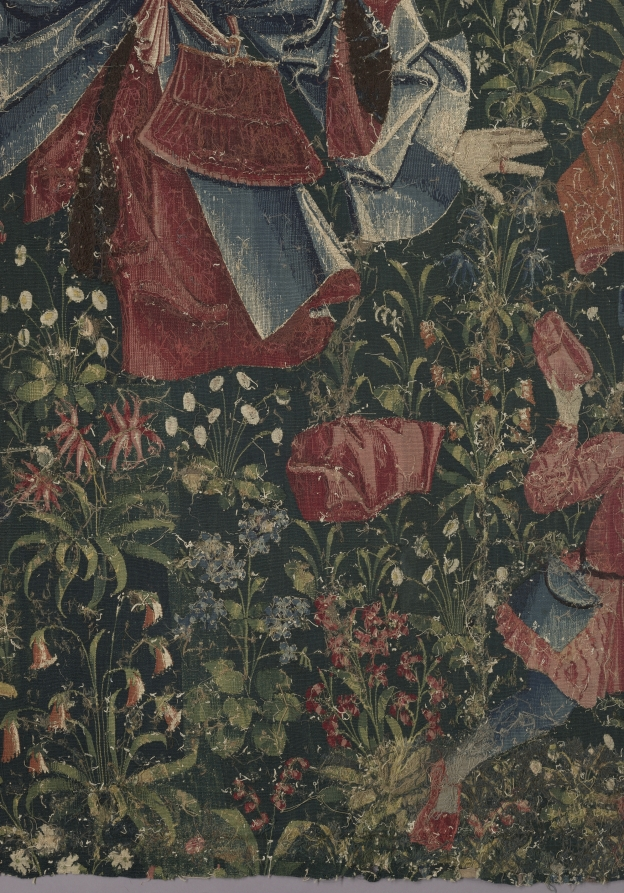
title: Youth (from Chateau de Chaumont set)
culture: France, Lyon(?), early 16th century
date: 1512–15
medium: silk and wool; tapestry weave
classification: Tapestry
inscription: French verse in Gothic letters translates as follows: Youth triumphs while its heart is healthy, And when it seems to hold all in its hand. But this triumph is without eternity. Here one sees the example full well: Those who are happy hide death in thier heart. Let the young heed this warning.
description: Louise of Savoy (1476-1531), queen mother of King Francis I, is depicted here in a sumptuous brocaded velvet in the center. She addresses youthful figures including Éléonore, Pierre Sala’s daughter who is facing her future husband, Hector. On the right, King Louis XII (died 1514) stands in front of the Chateau Langais where he had married Anne of Brittany. Above is Hector’s deceased father with a partially concealed skull under his robe, while a woman expresses surprise at the sight. The verse in Old French at the top states that youthful happiness is not eternal: Youth makes sounds as long as its heart is healthy, And thinks that it holds all in its hand. But this triumph is not eternal. Here you see clearly an example: He that is happy has death in his breast. Of this you people should take note.